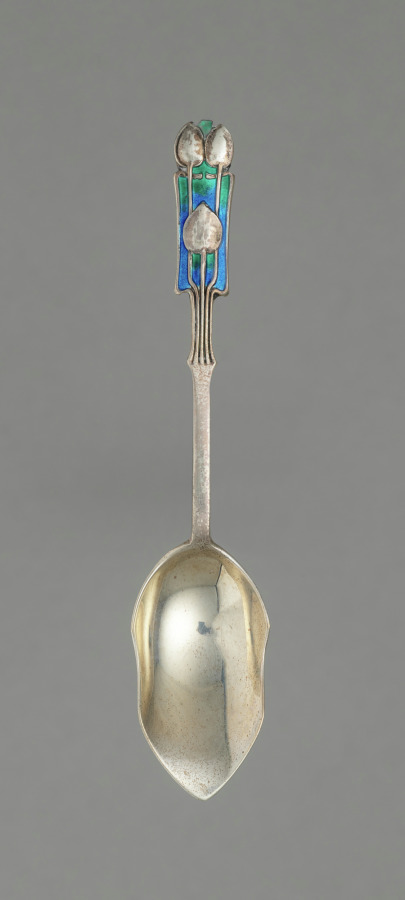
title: Set of six Spoons in Original Box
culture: England, London, 19th century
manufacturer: Liberty and Company (British)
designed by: attributed to Archibald Knox (British, 1864–1933)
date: c. 1895–1910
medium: Silver, enamel decoration and leather box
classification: Silver